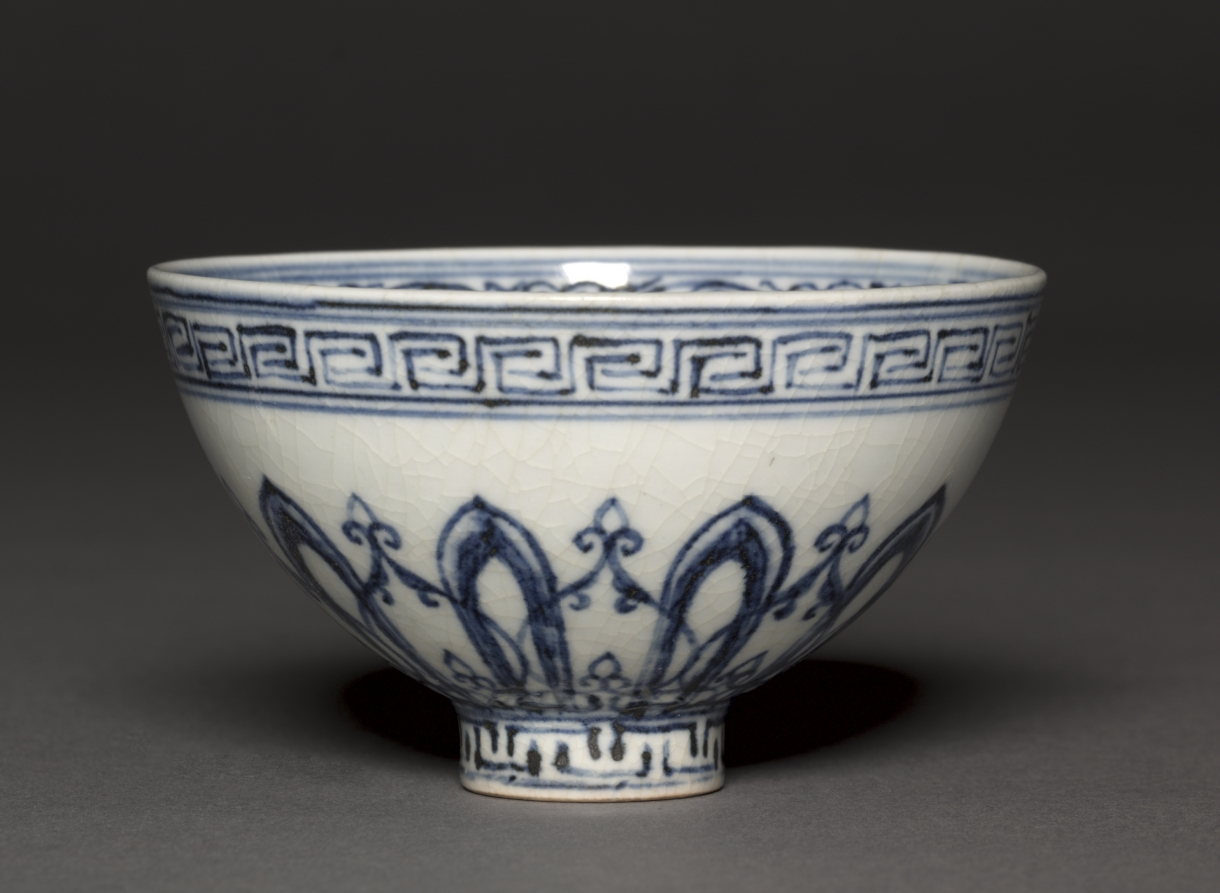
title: Lotus-Seed Bowl with Petals and Arabesques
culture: China, Jiangxi province, Jingdezhen, Ming dynasty (1368-1644), Yongle period (1403-1424)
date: 1403–24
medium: porcelain with underglaze blue decoration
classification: Ceramic